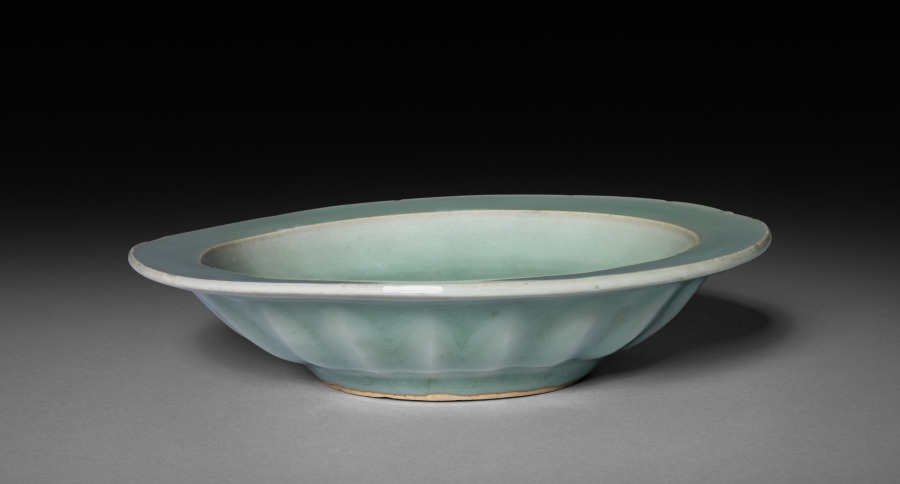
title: Dish with Two Fish in Relief: Longquan Ware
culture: China, Zhejiang province, Yuan dynasty (1271-1368)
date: early 14th Century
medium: glazed porcelain with unglazed molded decoration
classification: Ceramic